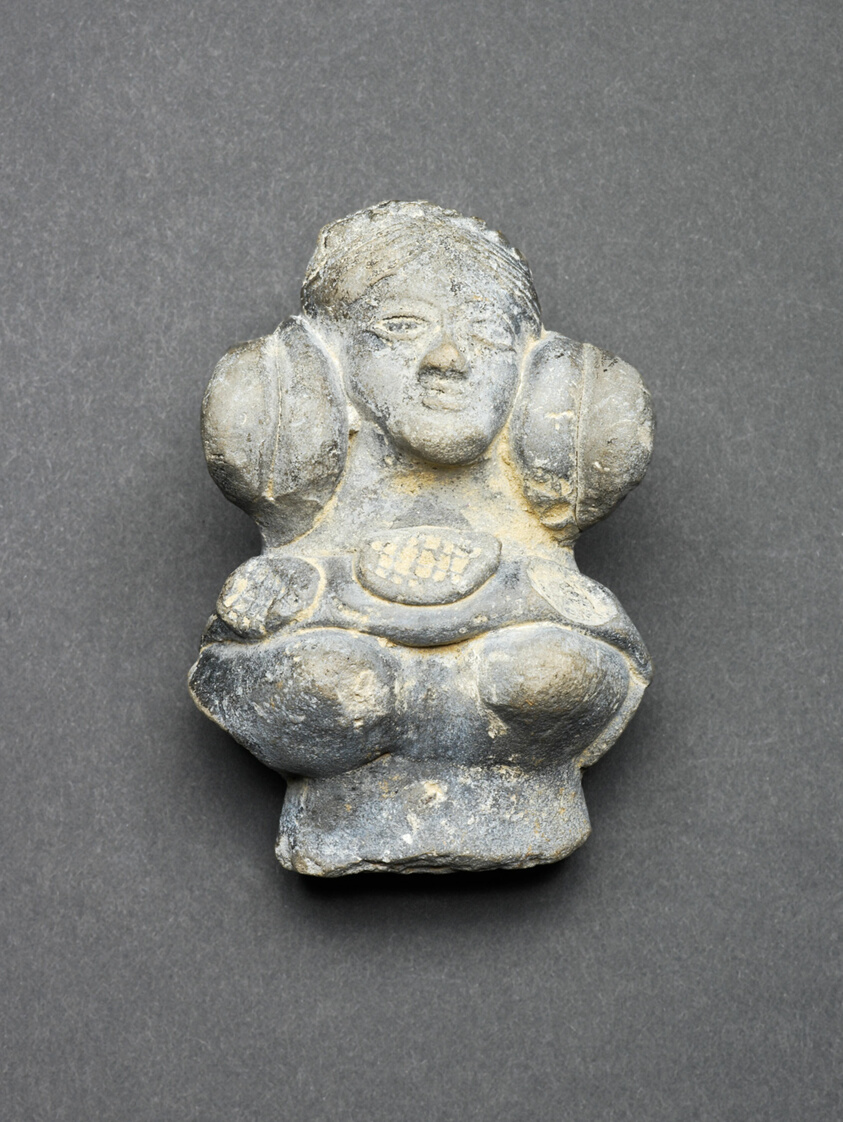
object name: Sculpture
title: Bust of a Female Figurine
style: South Asian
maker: India; Uttar Pradesh, Mathura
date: Mauryan period, 3rd/2nd century B.C.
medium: Hand-modeled gray terracotta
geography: Mathura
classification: earthenware; ceramics; sculpture; asian art